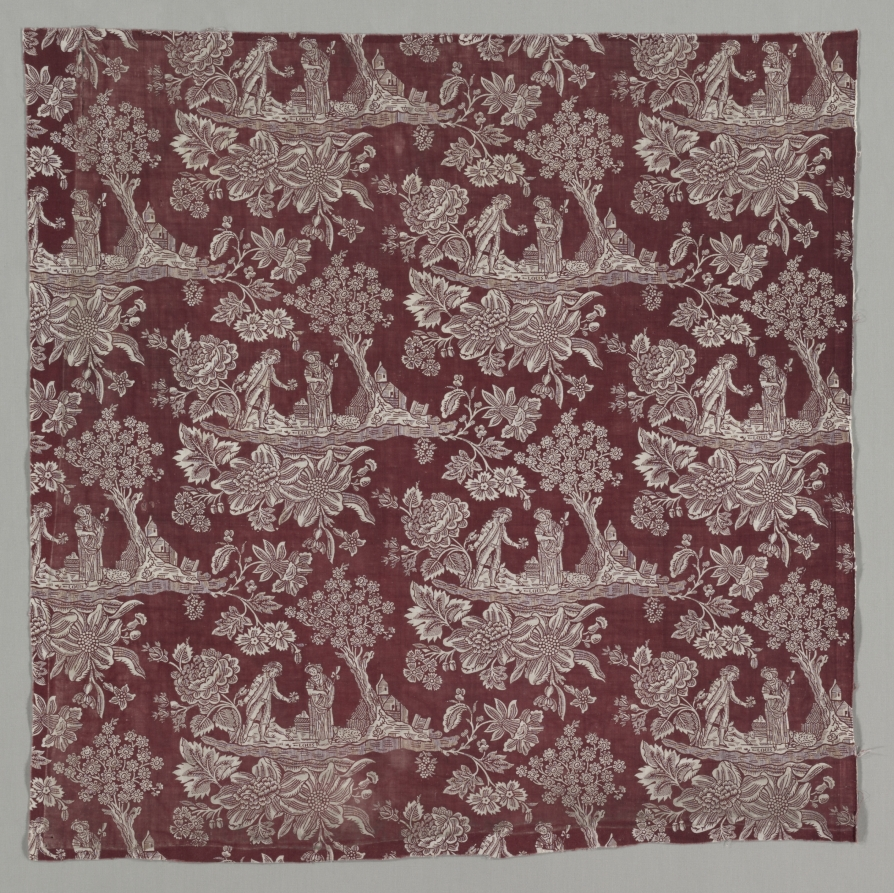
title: Fragment of Woodblock Printed Cotton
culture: France, late 18th century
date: 1770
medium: woodblock print on cotton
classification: Textile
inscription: label printed in red: "Louis."